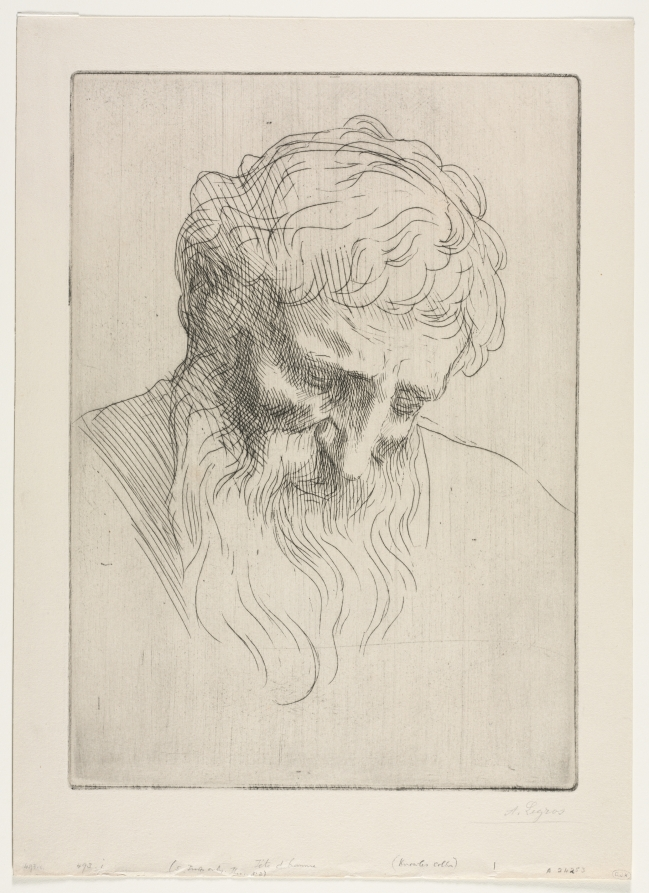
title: Head of a Man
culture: France, 19th century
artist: Alphonse Legros (French, 1837–1911)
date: c. 1857–1911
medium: drypoint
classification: Print